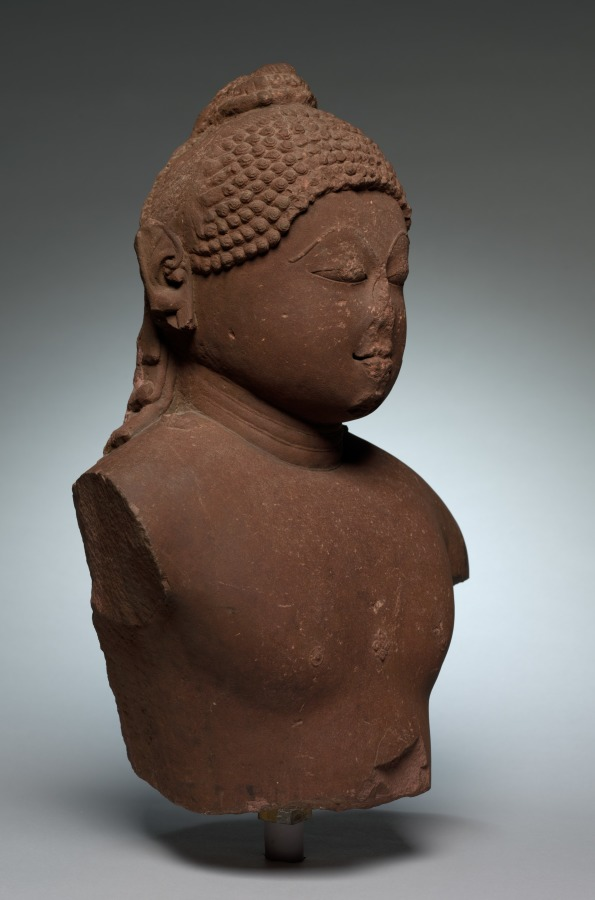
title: Rishabha, the First Jina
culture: Central India, Chandela Dynasty, 9th - 10th Century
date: 800s–900s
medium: stone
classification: Sculpture